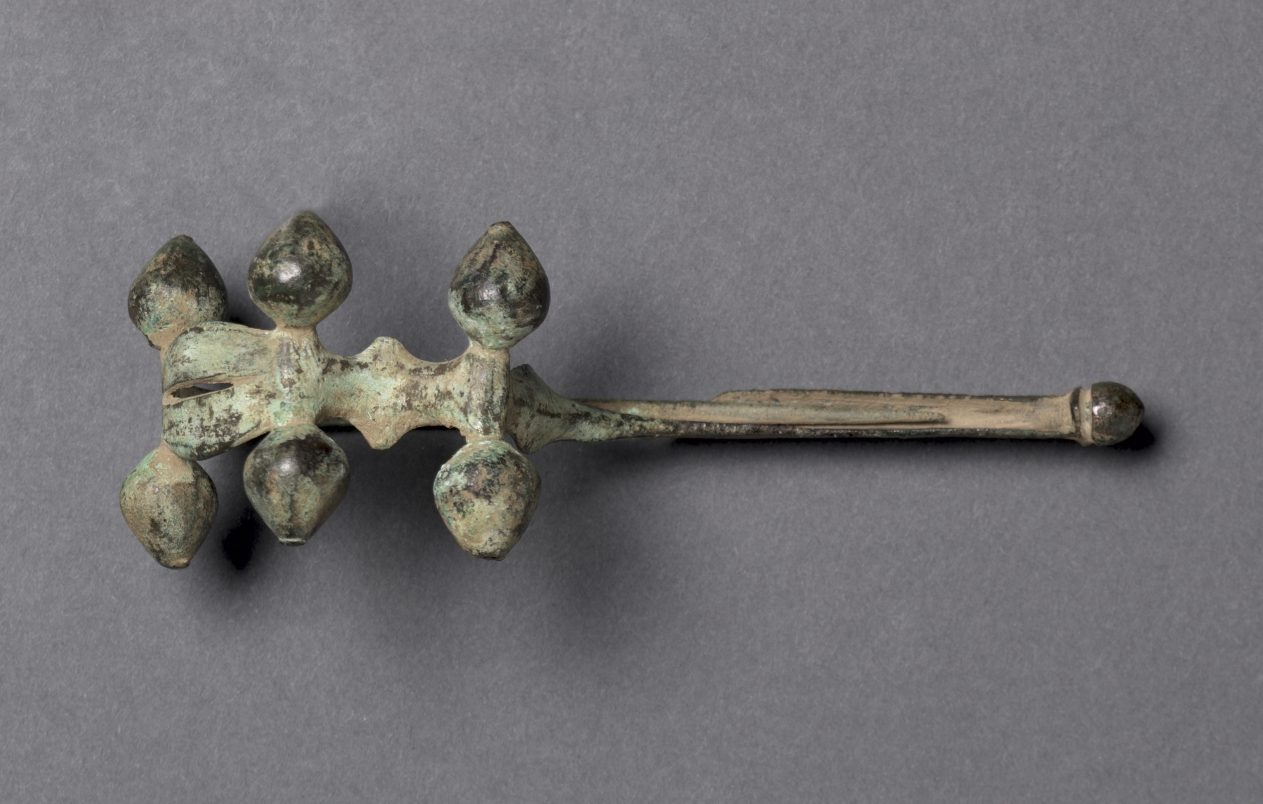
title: Fibula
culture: Etruscan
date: c. 500 BCE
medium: bronze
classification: Jewelry